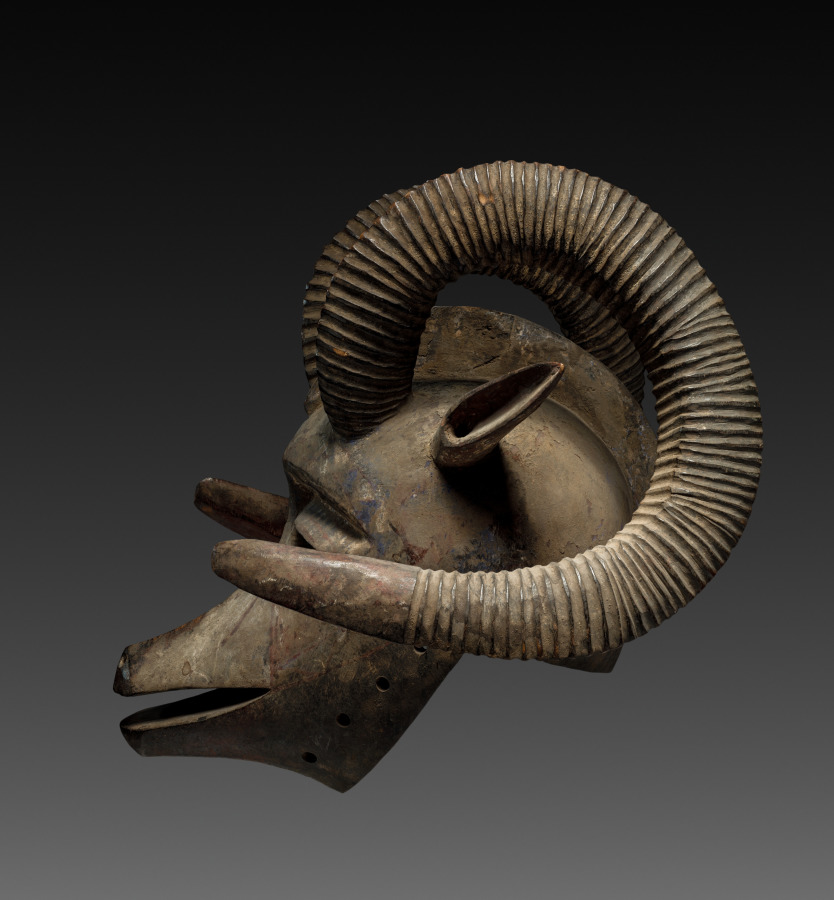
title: Ram Mask (Bolo)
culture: Africa, West Africa, Burkina Faso, Bobo-style blacksmith-carver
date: possibly early 1900s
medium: Wood and paint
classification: Mask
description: Bolo masks are primarily danced for entertainment during communal occasions like funerals, male initiations, and harvest celebrations. Comprising both animal and human features, the mask––always worn by a male dancer––refers to the cultural significance of the ram, an animal associated with male aggression across sub-Saharan Africa.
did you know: The mask was vividly painted while in use. Look closely at its surface to see traces of blue, red, and white paint.